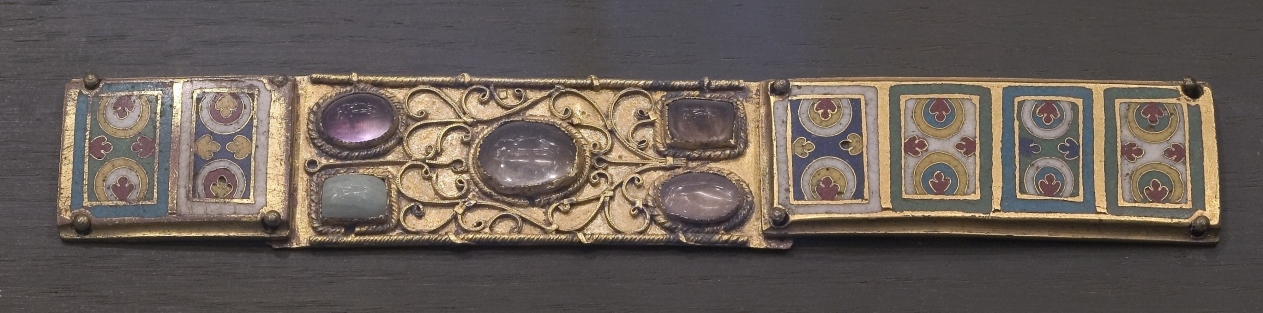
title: Decorative Plaque, Probably from a Reliquary Shrine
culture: Germany, Cologne?, Romanesque period, 12th century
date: c. 1200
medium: gilded copper, gold wire, cabochons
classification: Enamel